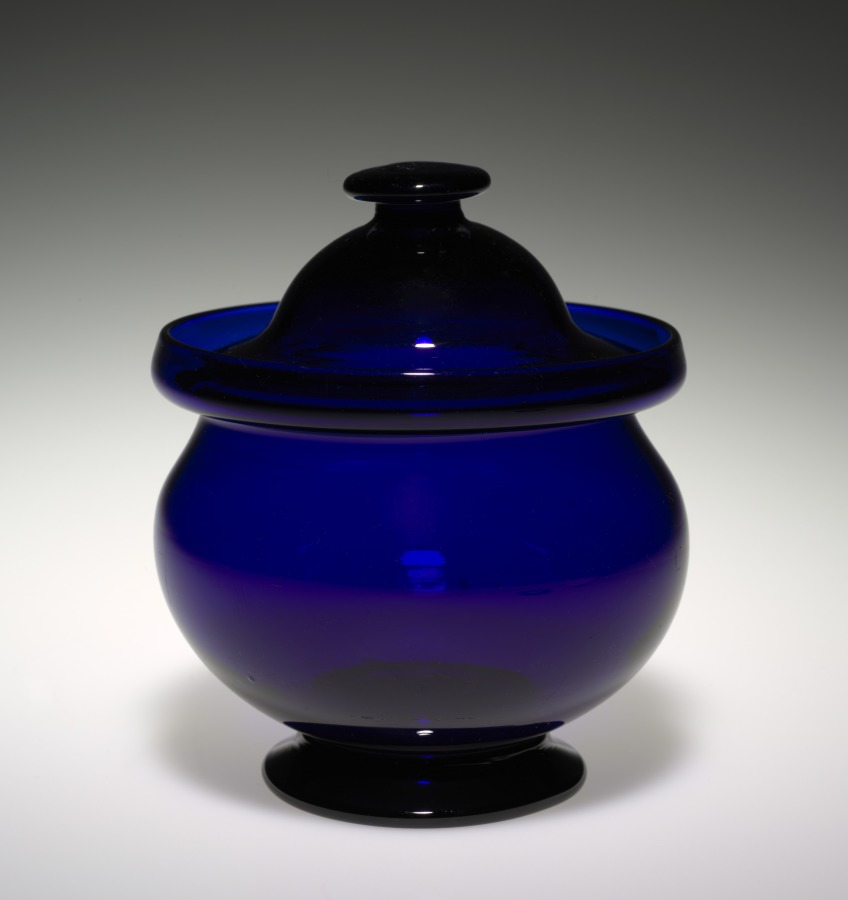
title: Sugar Bowl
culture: America, South Jersey Type, 19th century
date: c. 1840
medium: glass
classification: Glass